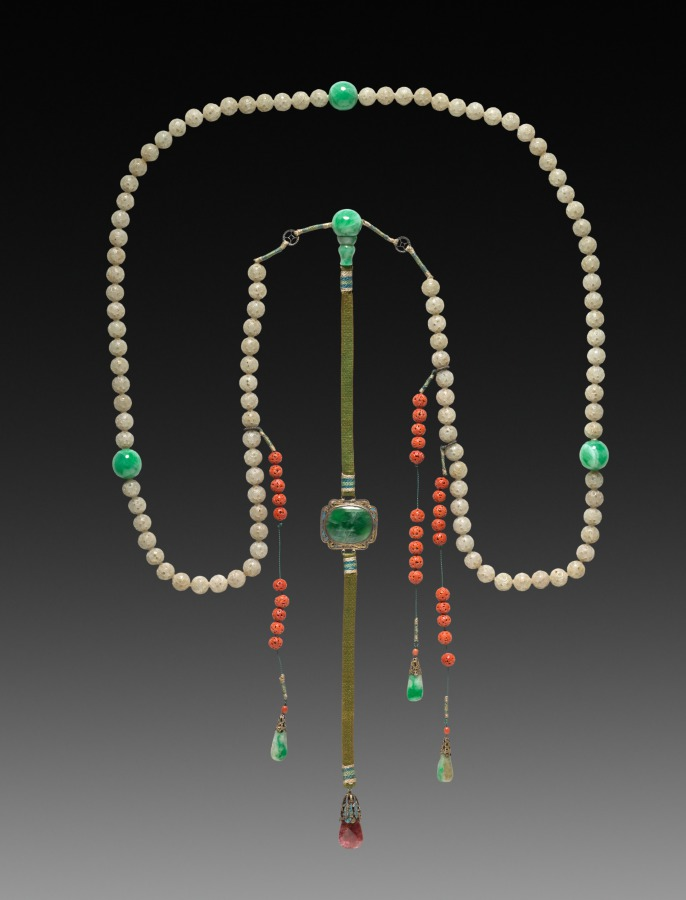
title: Mandarin Necklace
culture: China, Qing dynasty (1644-1911)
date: 1700s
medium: jade and coral beads, pendants mounted in gold and enamel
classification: Jewelry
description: Bead necklaces were worn by both high-ranking women and men, with a central string running over the person’s back and two side strings falling parallel to the necklace over the chest. The white jade and coral beads are intricately carved and perforated. The central pendant is amethyst, while the green jade pendants are mounted in gold and enamel.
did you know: This necklace includes 30 coral beads and 108 white jade beads.